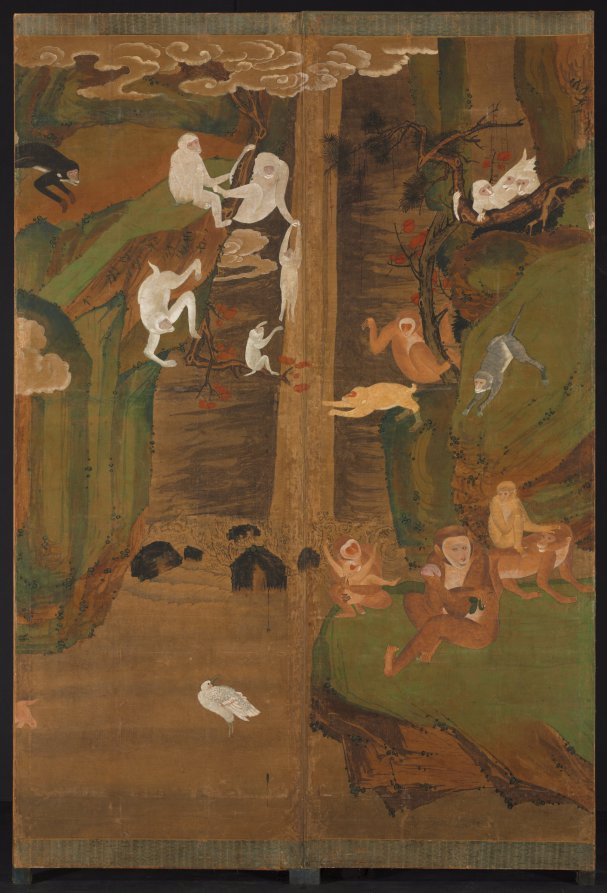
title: Gibbons in a Landscape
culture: Korea, Joseon dynasty (1392–1910)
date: early 1900s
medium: Six-panel folding screen; ink and color on hemp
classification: Painting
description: In this folding screen, gibbons playfully interact with each other. In Korean paintings, gibbons were less frequently depicted than in their Chinese and Japanese counterparts. However, they became popular toward the end of the 1800s, possibly due to an influx of Chinese and Japanese decorative arts. Gibbons symbolize good fortune, but as paired with the red autumn foliage, specifically refer to professional success, such as passing the government examination and getting promoted to a higher position. The large ripe peach held by one gibbon bears another symbolic meaning: prosperity and longevity.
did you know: Gibbons were often presented to the Joseon royal court as diplomatic gifts from the Japanese government.